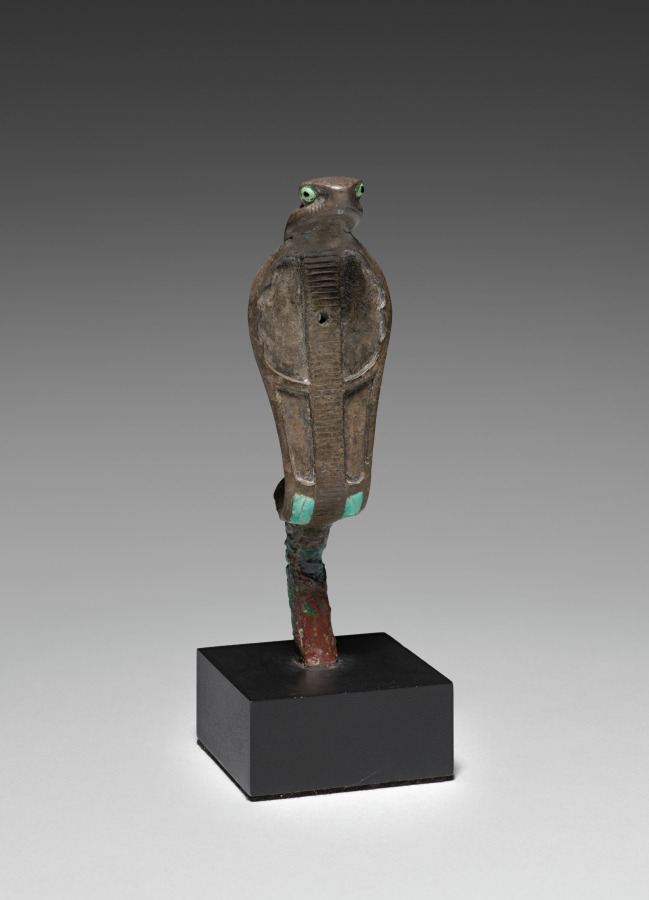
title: Uraeus (Rearing Cobra)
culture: Egypt, New Kingdom (1540–1069 BCE), Dynasty 19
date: 1307–1196 BCE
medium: Silver-copper alloy with inlays (copper, feldspar, turquoise, obsidian?) and gilding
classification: Metalwork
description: Made from a silver-copper alloy, this rearing cobra likely served as a uraeus, symbolizing royal or divine power in ancient Egypt. Its lowermost portion likely fit into the top of the head of a large sculpture, while its body and tail seem cut short, perhaps making room for a solar disk to rise up behind. The eyes are inlaid, and six cavities for additional inlay remain on the expanded hood, the lowermost still intact, the others likely once filled with brightly colored blue and red stone. Much of the remaining surface may once have been gilded, to judge from remaining traces of gold on the back.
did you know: The word uraeus comes from an Egyptian term for “rising/rearing up,” describing the cobra’s position.